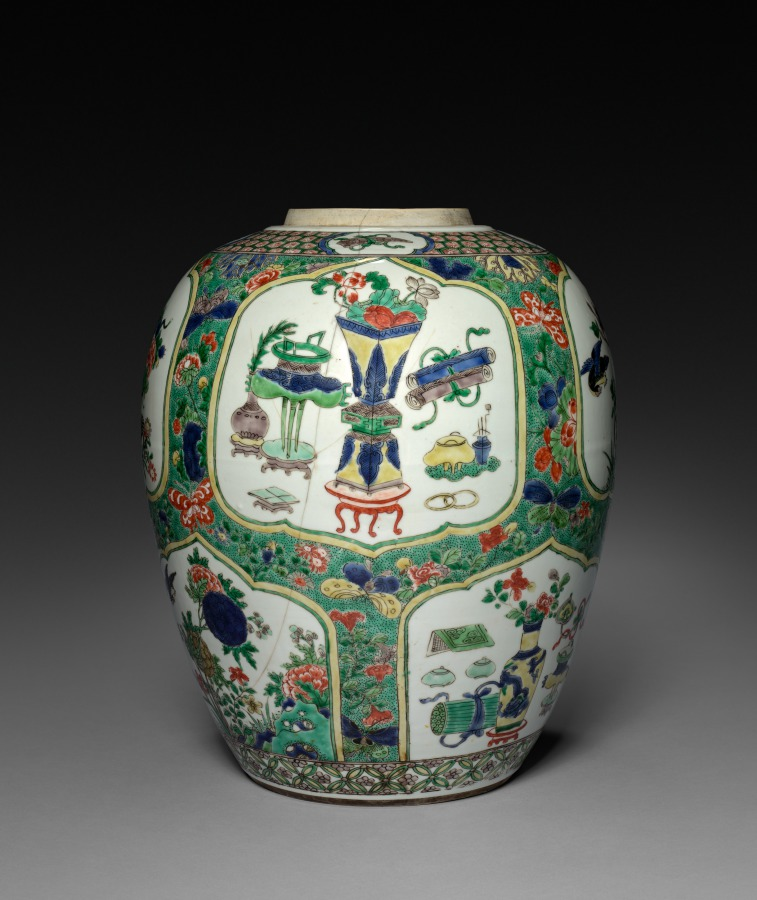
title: Vase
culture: China, Qing dynasty (1644-1911), Kangxi reign (1661-1722)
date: 1622–1722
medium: porcelain with underglaze decoration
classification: Ceramic